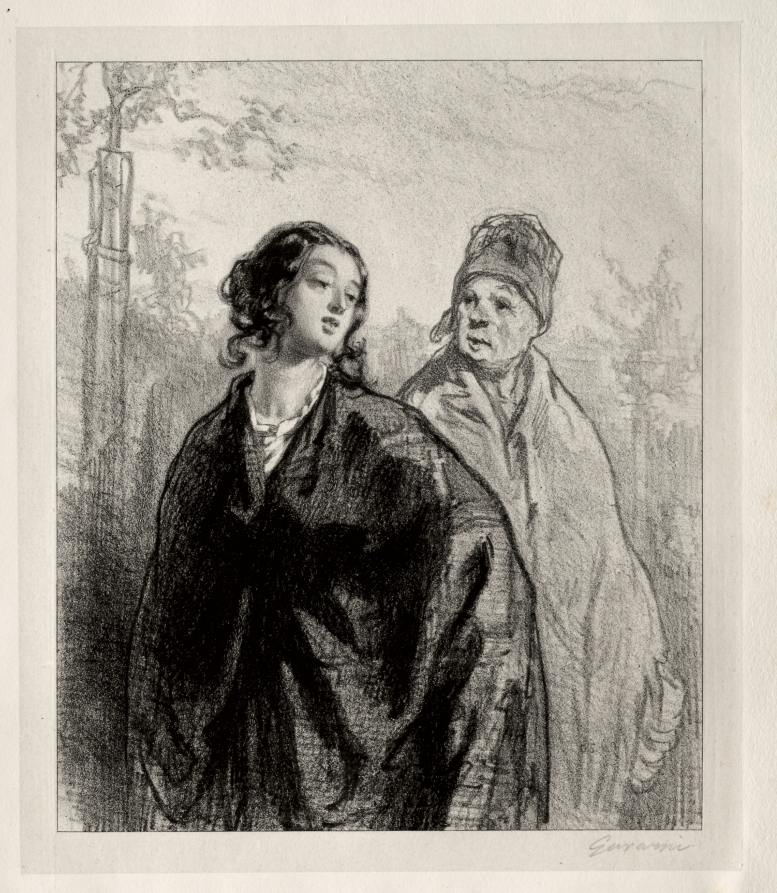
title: La Fille et la mère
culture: France, 19th century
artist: Paul Gavarni (French, 1804–1866)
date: c. 1854–56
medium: lithograph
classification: Print